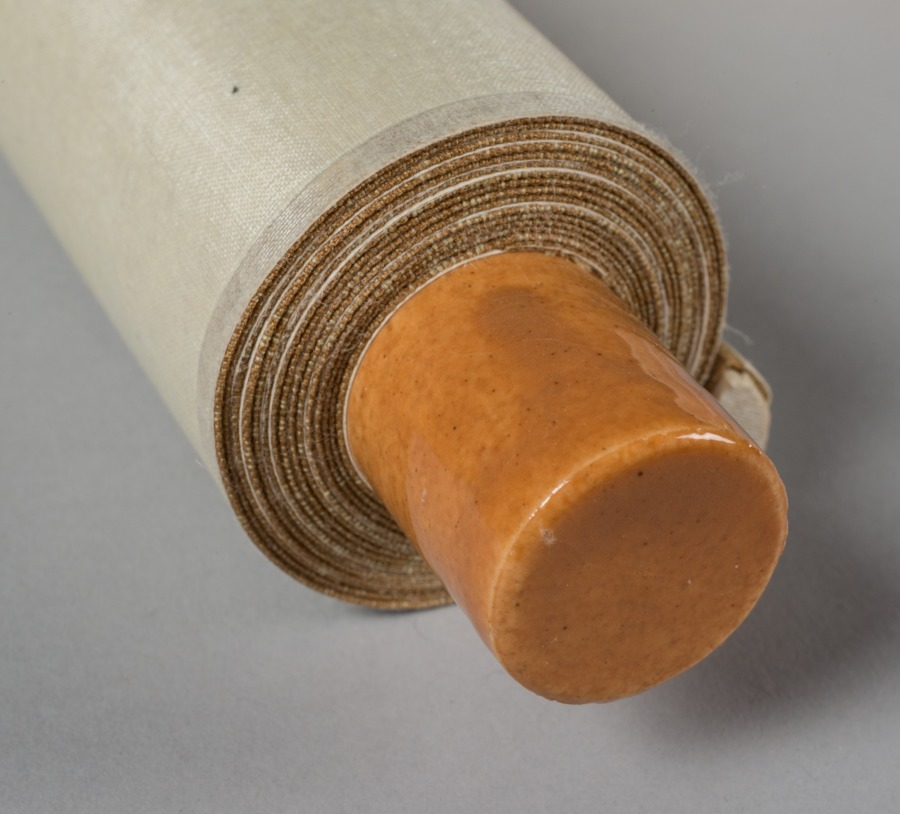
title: Genre Figures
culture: Japan, Edo period (1615–1868)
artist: Takebe Sōchō (Japanese, 1760–1814)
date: c. 1816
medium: hanging scroll; ink and color on paper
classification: Painting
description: Though rarely mentioned in official histories, Socho was an accomplished painter whose talent is readily apparent to the modern eye. For his compositions he chose traditional Japanese stories or everyday events. This painting belongs to a triptych (set of three) that was recently converted from folding screen panels to hanging scrolls.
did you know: The adult in this painting transports a small sculpted image of the fox deity Inari atop his head.